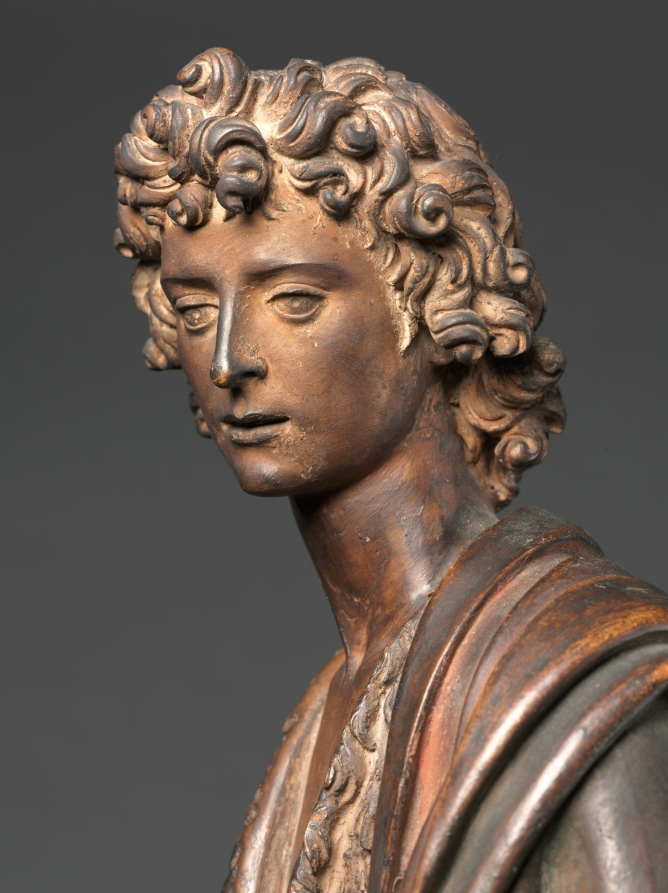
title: Saint John the Baptist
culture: Italy, Florence, 16th century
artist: Master of the Saint John Statuettes (Italian)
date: c. 1500–1525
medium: terracotta with traces of polychromy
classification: Sculpture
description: This statuette belongs to a group of terracotta sculptures representing David (from the OldTestament) and Saint John (from the New Testament) produced by a still unidentified Florentine artist and his studio in the late 1400s and early 1500s. Giventheir scale, it seems likely that these sculptures were intended for use in private homes rather than churches.